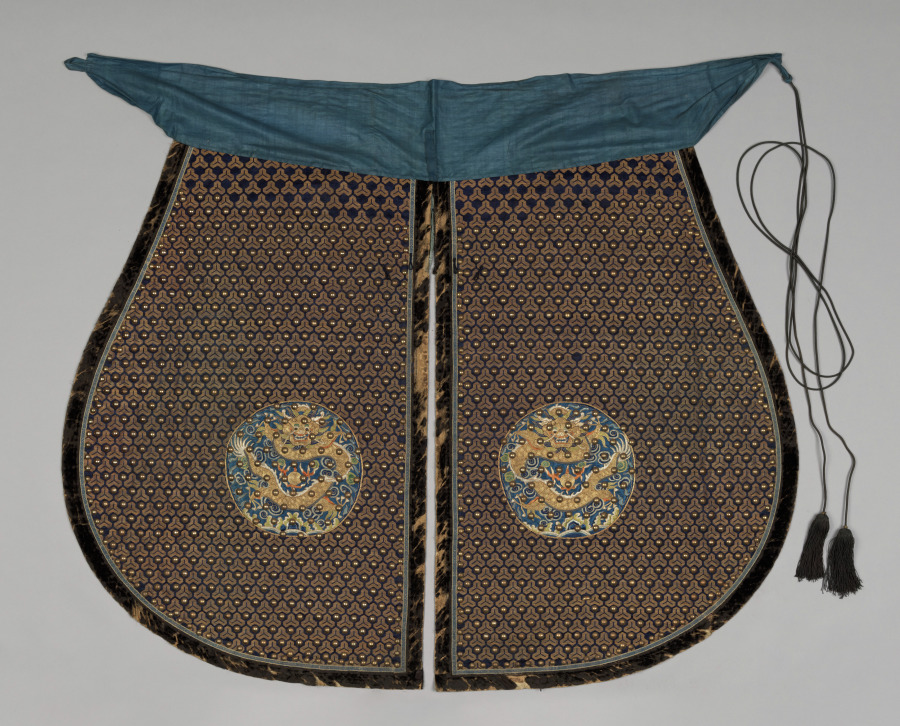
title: Ceremonial Uniform: Skirt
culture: China, Qing dynasty (1644-1911)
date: 1644–1911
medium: satin weave silk with gold metal thread embroidery; supplementary weft; black velvet; metal (brass?); lined in blue silk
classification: Arms and Armor